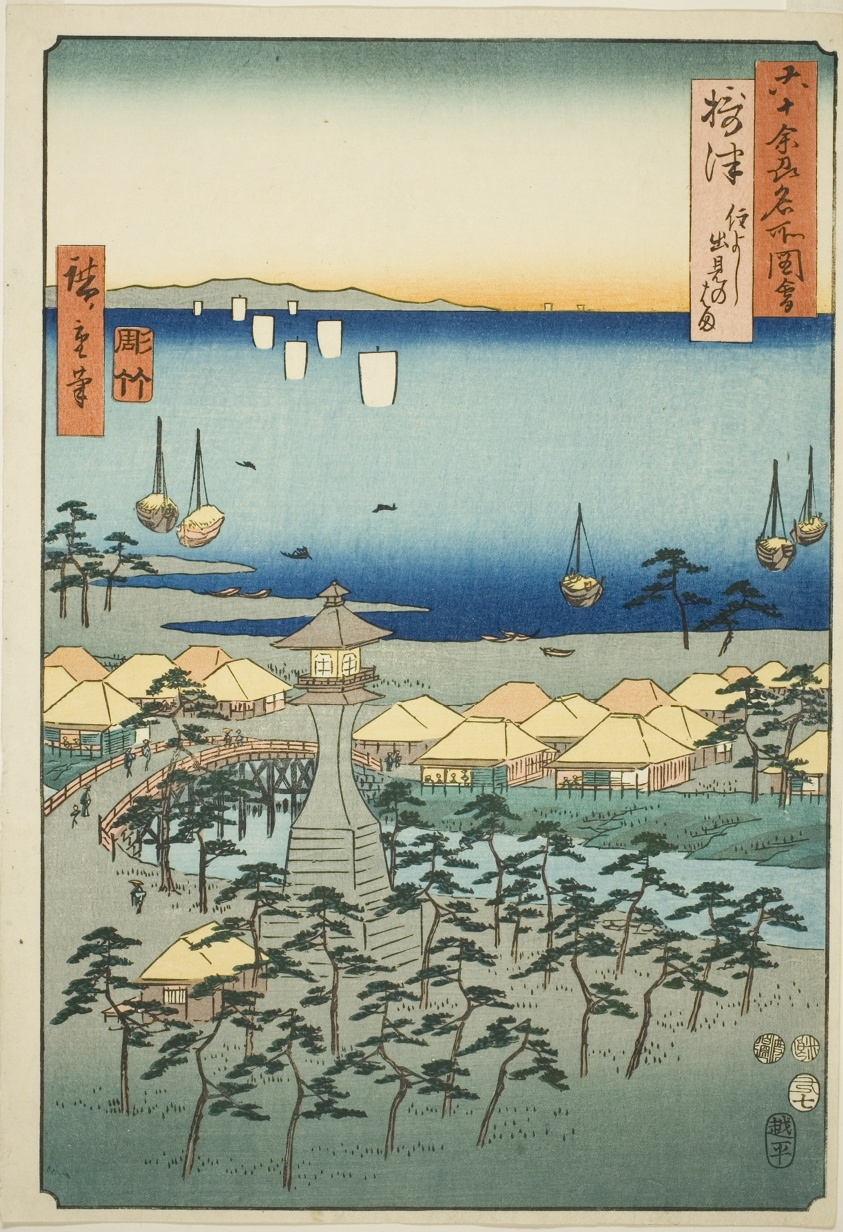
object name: Print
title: Settsu Province: Idemi Beach at Sumiyoshi (Settsu, Sumiyoshi Idemi no hama), from the series "Famous Places in the Sixty-odd Provinces (Rokujuyoshu meisho zue)"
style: Japanese (culture or style)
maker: Utagawa Hiroshige 歌川 広重; Japanese, 1797-1858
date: 1853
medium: Color woodblock print; oban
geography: Japan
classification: woodblock print; print; asian art